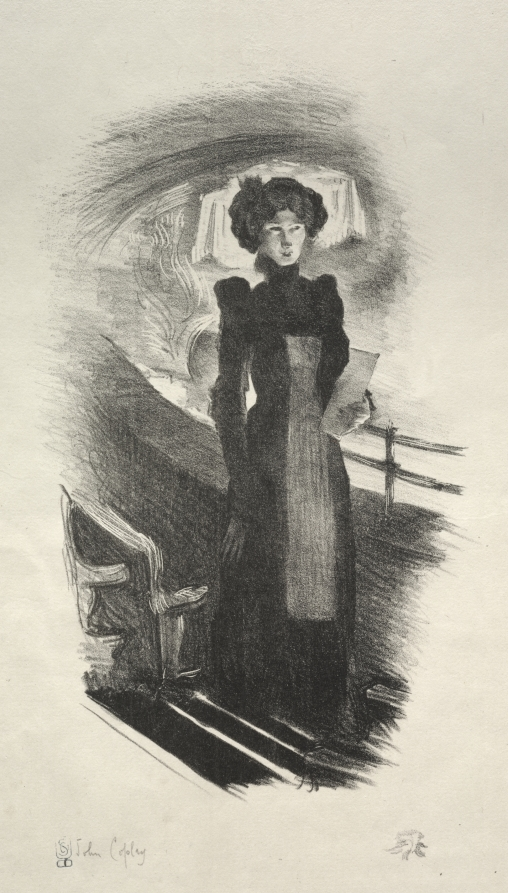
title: The Programme Seller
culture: England, 20th century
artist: John Copley (British, 1875–1950)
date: 1909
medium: lithograph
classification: Print